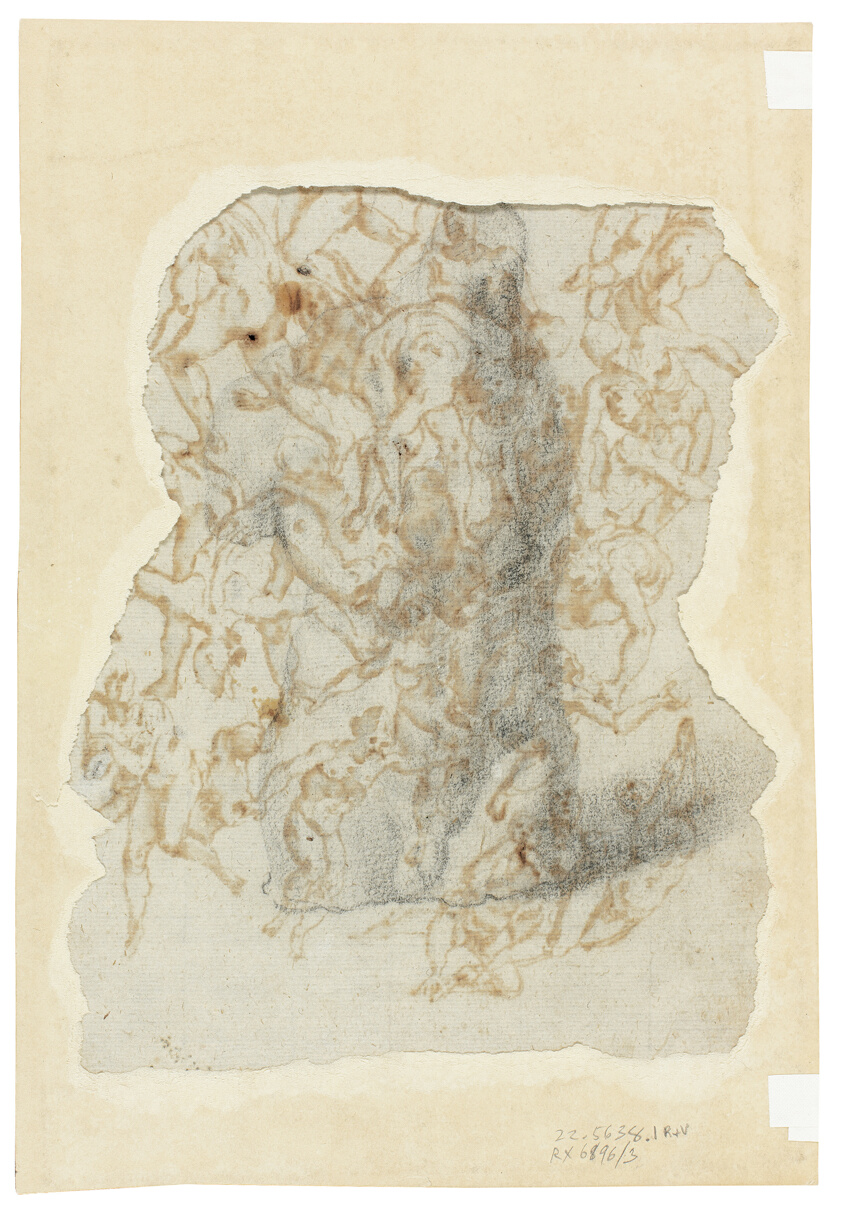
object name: Drawing and Watercolor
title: Fall of the Damned (recto) Male Torso (verso)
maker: Circle of Ludovico Cardi, called Il Cigoli; Italian, 1559-1613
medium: Pen and brown ink with brush and blue wash over black chalk, on tan laid paper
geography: Italy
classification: pen and ink drawings; drawings (visual works); prints and drawing